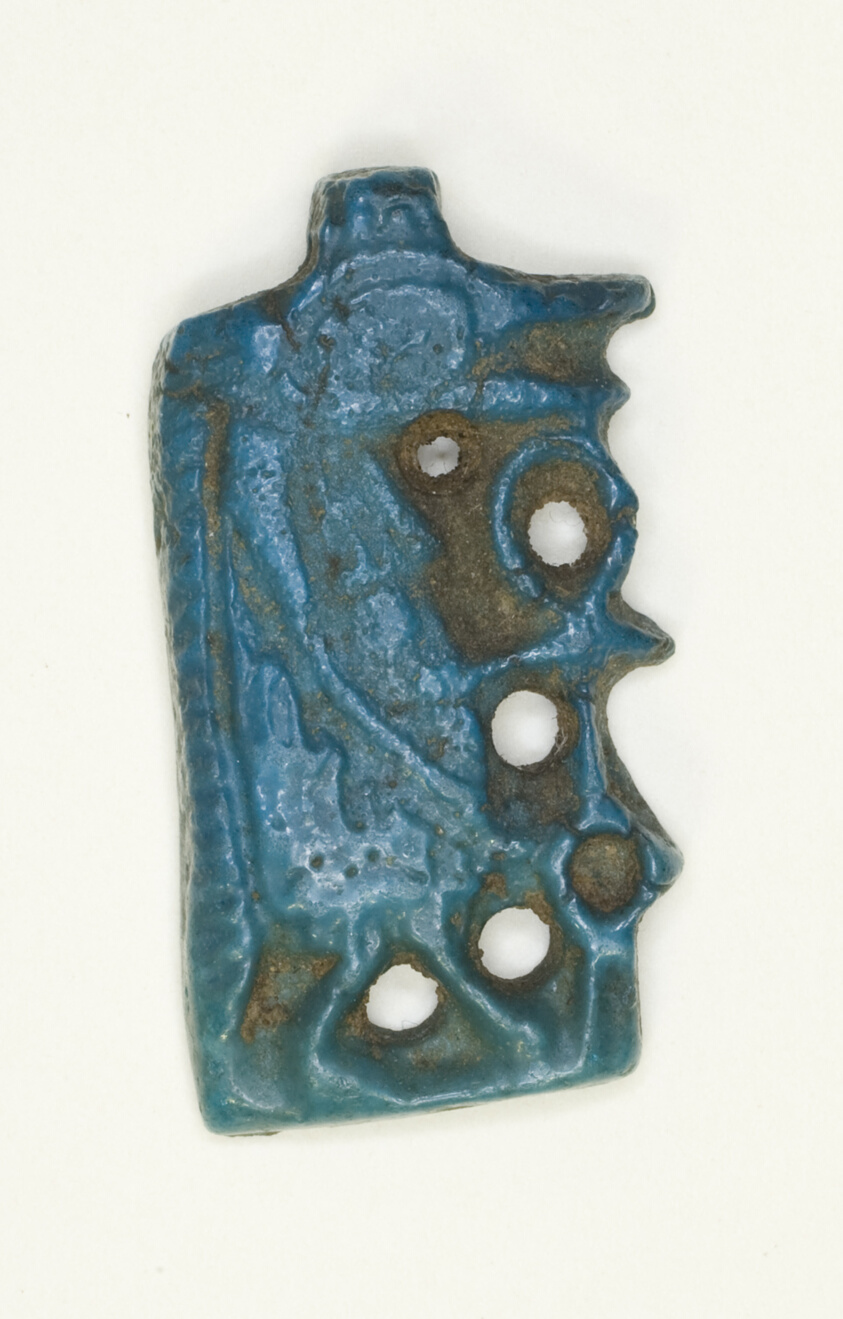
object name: Costume and Accessories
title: Amulet of the Goddess Tawaret (Thoeris)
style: egyptian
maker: Egyptian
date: New Kingdom, Dynasties 18–20 (about 1550–1069 BCE)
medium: Faience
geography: Egypt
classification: amulet; jewelry; glass; ancient art; costume; faïence (composite material)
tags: goddesses